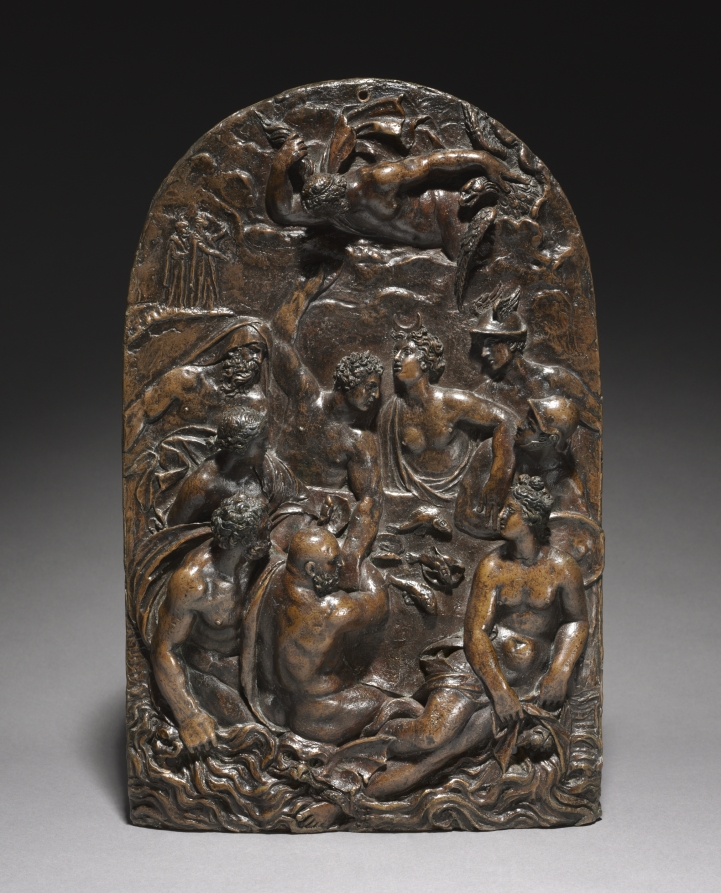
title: Feast of the Gods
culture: Italy, 16th century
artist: probably by Alessandro Vittoria (Italian, 1525–1608)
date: c. 1571–1578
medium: bronze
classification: Sculpture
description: Banquets of the gods were common literary devices in classical texts and myth, and their use here enmeshed with the desire to capture the sensuality of the body and water in motion.